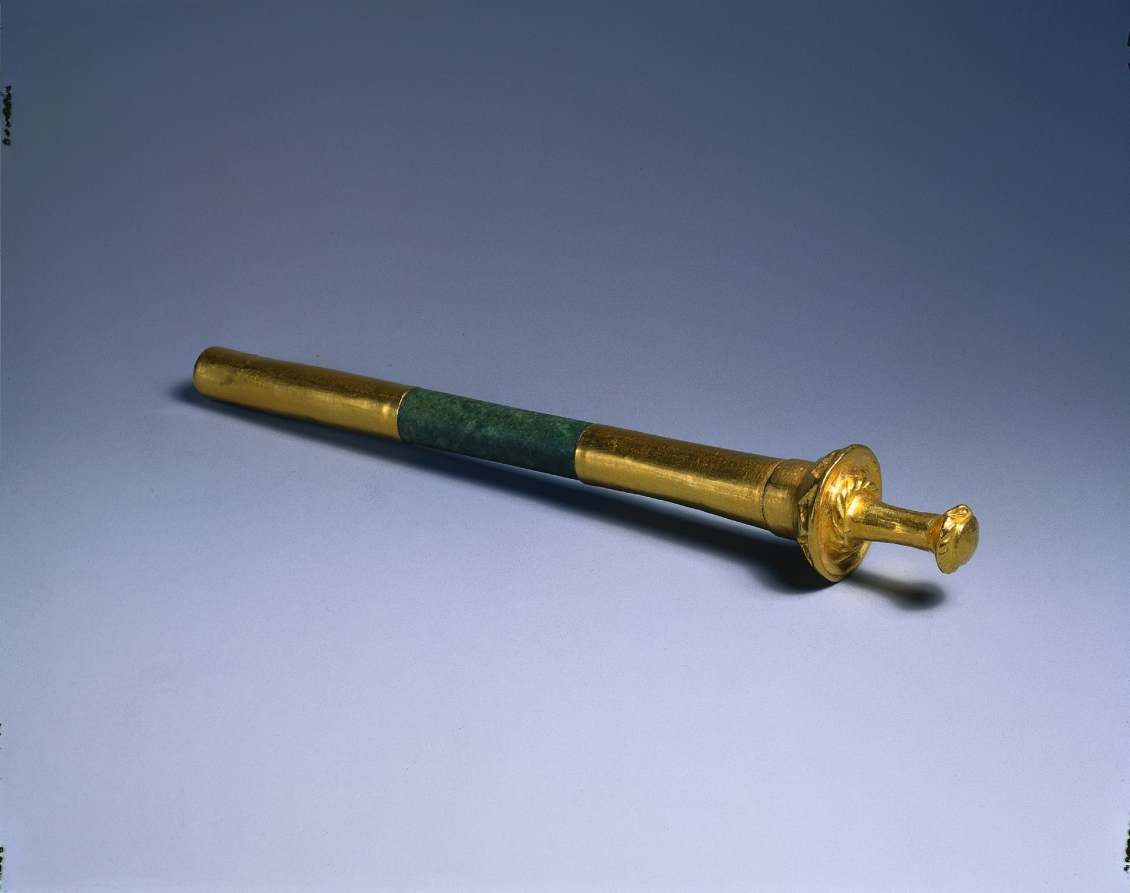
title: Ear Rod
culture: Panama, Conte style, 5th - 10th century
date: c. 700–900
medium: hammered gold, with greenstone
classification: Metalwork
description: Harvard archaeologists excavated this and seven other ornaments from several burials at Sitio Conte, a cemetery famous for its lavish graves of powerful chieftains. The young man buried in Grave 26 was such a chief. His status was stunningly memorialized by 21 human companions and 475 objects, many of them personal ornaments made of gold, including a large chest plaque and the rod-shaped ear ornament shown here.